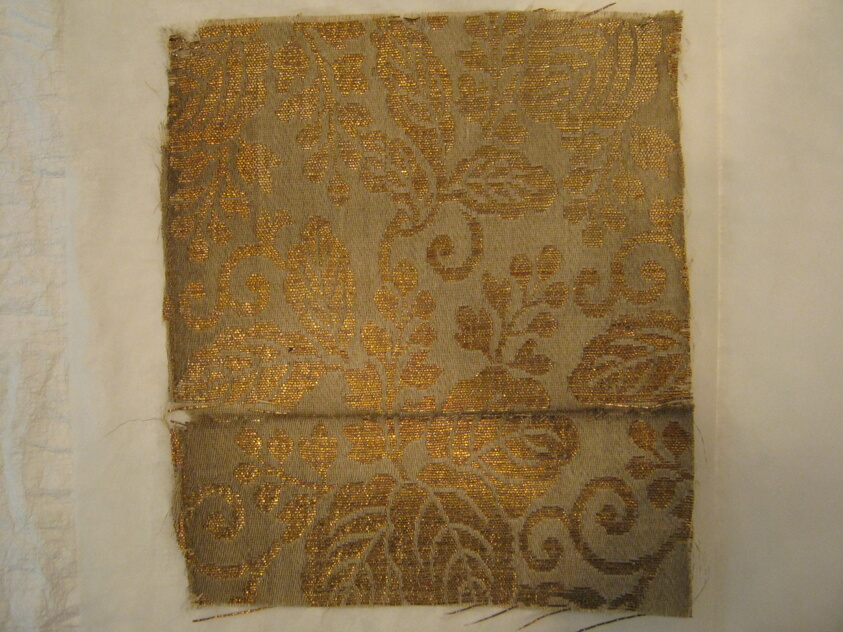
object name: Textile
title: Fragment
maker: Japan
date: Edo period (1615–1868), 1775/1825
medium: Plain compound twill, silk & gilt paper; 1 1/2 strips to m.m.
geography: Japan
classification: textile; weaving